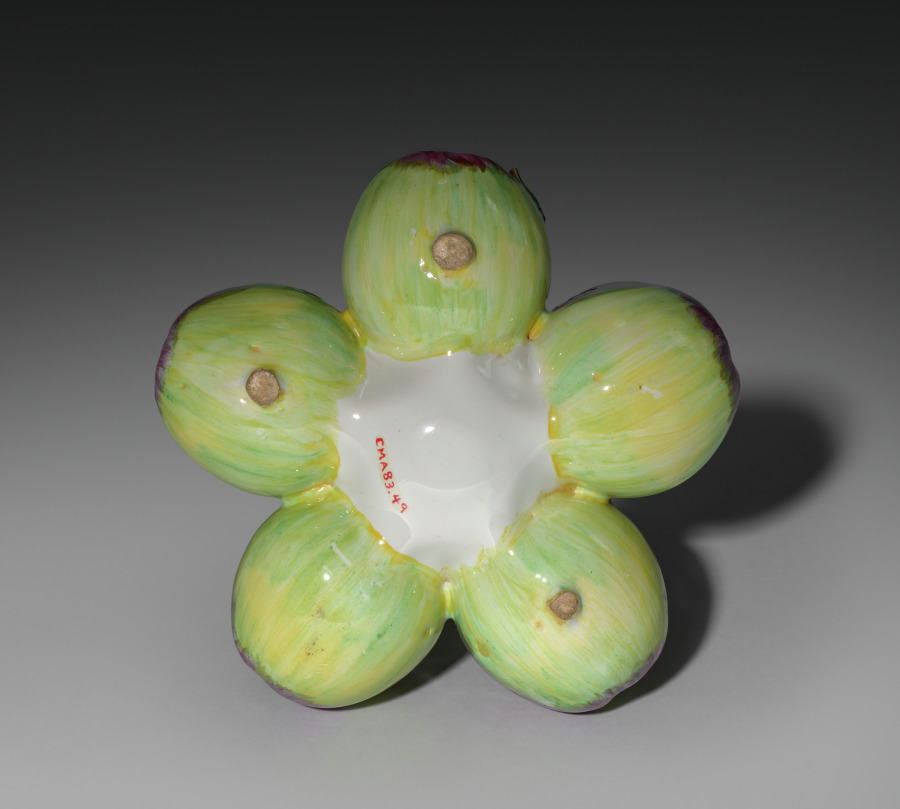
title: Box in the Form of Apples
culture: France, 18th century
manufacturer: Sceaux Factory (French, active 1748–66)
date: c. 1760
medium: Tin- glazed earthenware (faience) wth enamel decoration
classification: Ceramic